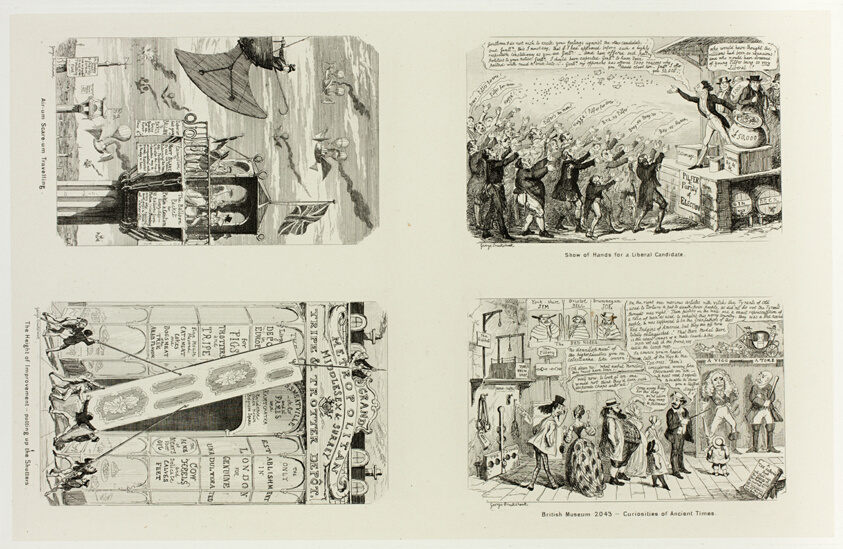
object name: Print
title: Show of Hands For a Liberal Candidate from George Cruikshank's Steel Etchings to The Comic Almanacks: 1835-1853 (top left)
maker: George Cruikshank (English, 1792-1878); published by Pickering & Chatto (English, 19th century)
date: 1843, printed c. 1880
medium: Four steel etchings in black on cream India paper, laid down on off-white card (chine collé)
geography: England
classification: etching; paper; print; prints and drawing